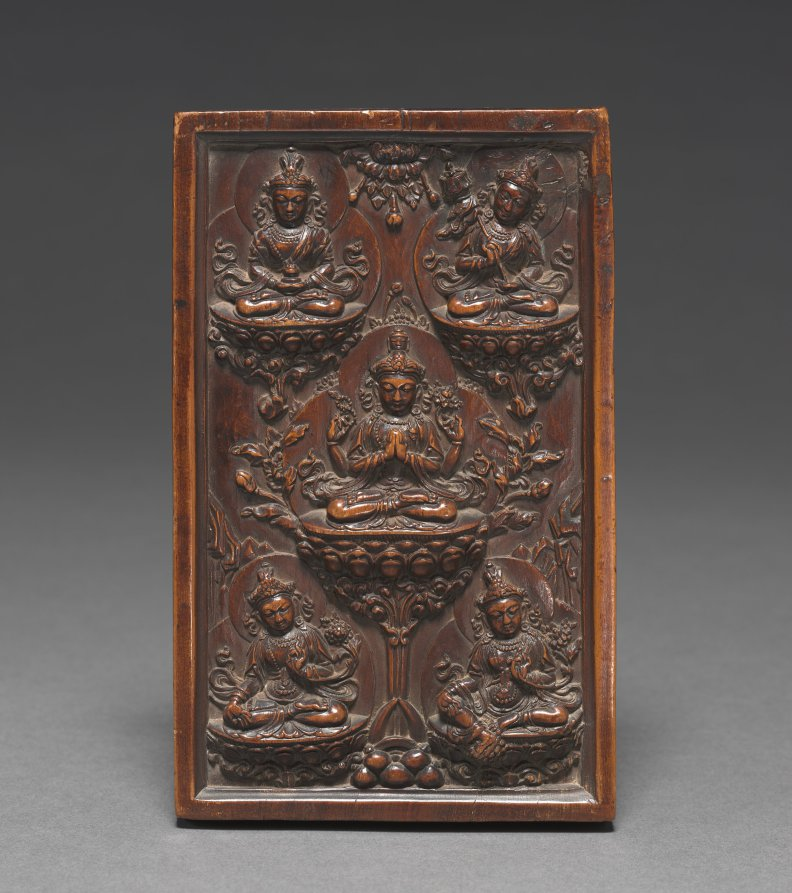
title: Sadaksari-Lokesvara Mandala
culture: Tibet, Ming dynasty (1368-1644)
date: c. 1475–1525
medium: wood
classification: Sculpture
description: A quintet of Buddhist divinities are seated on lotus thrones supported by scrolling floral forms. They are carved in relief on a wooden block and arranged diagrammatically. This configuration establishes the icon to be a mandala.